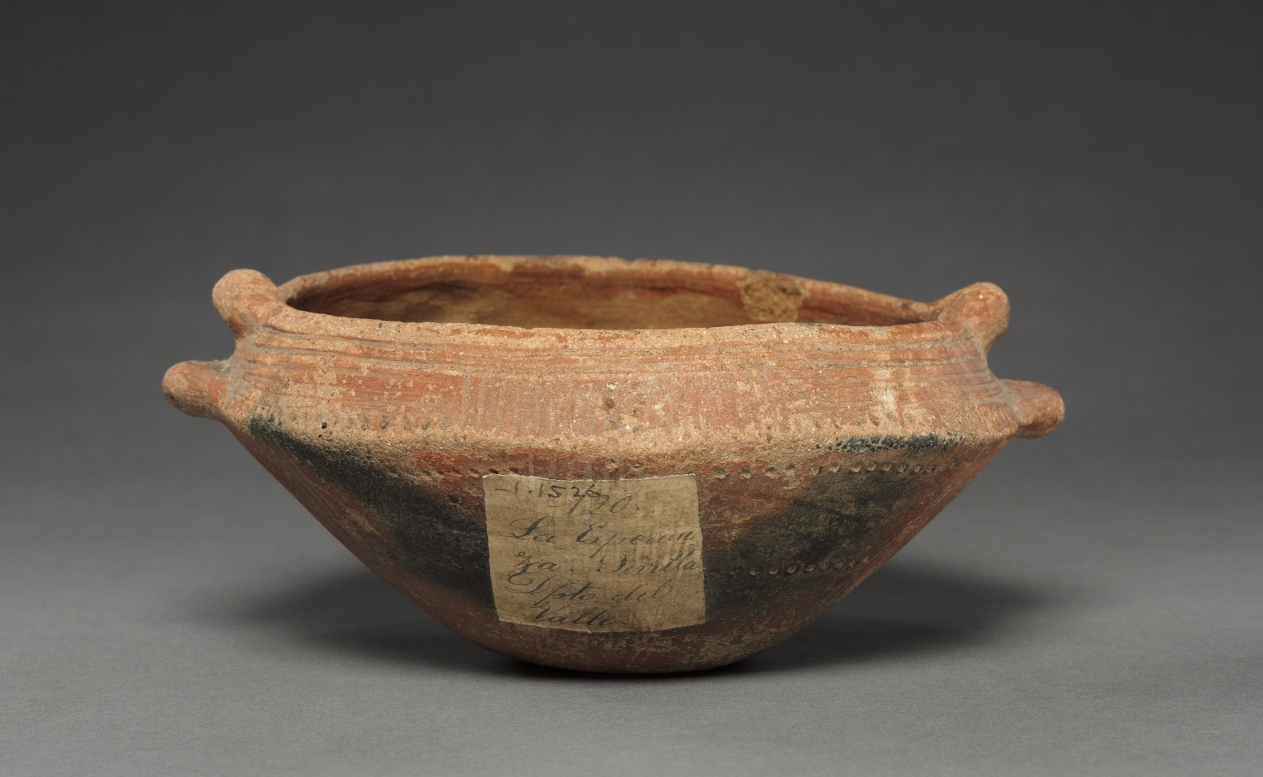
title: Jar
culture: Colombia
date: before 1550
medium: red ware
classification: Ceramic